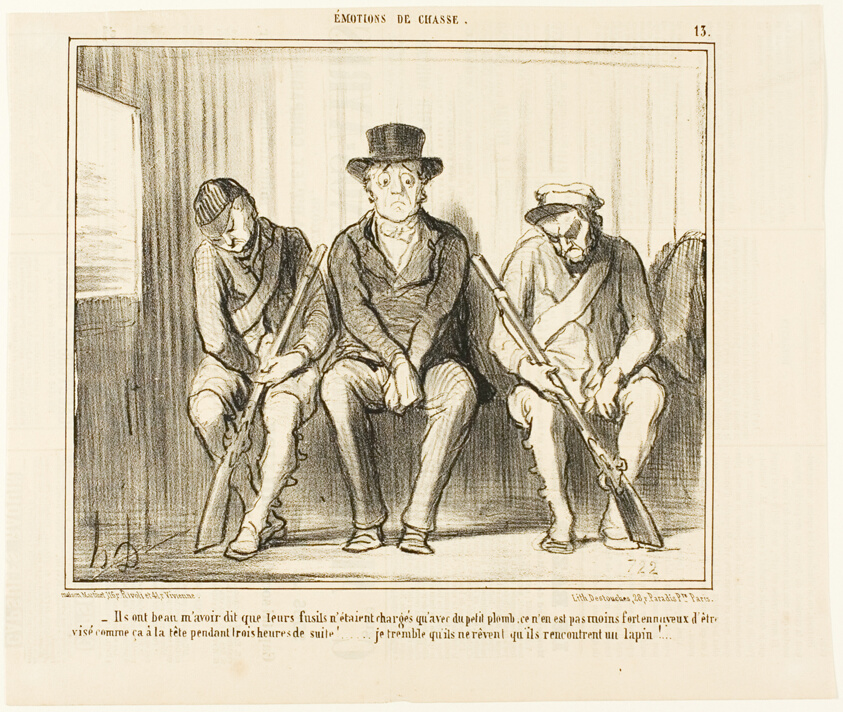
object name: Print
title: “- Inspite of all their assertions that their guns are only loaded with small shots, it is nonetheless annoying to be aimed at the head like this for three consecutive hours... I tremble at the thought that they might dream of an encounter with a rabbit...,” plate 13 from Émotions De Chasse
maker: Honoré Victorin Daumier; French, 1808-1879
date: 1855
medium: Lithograph in black on white wove paper, with letterpress verso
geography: France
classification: lithograph; print; prints and drawing